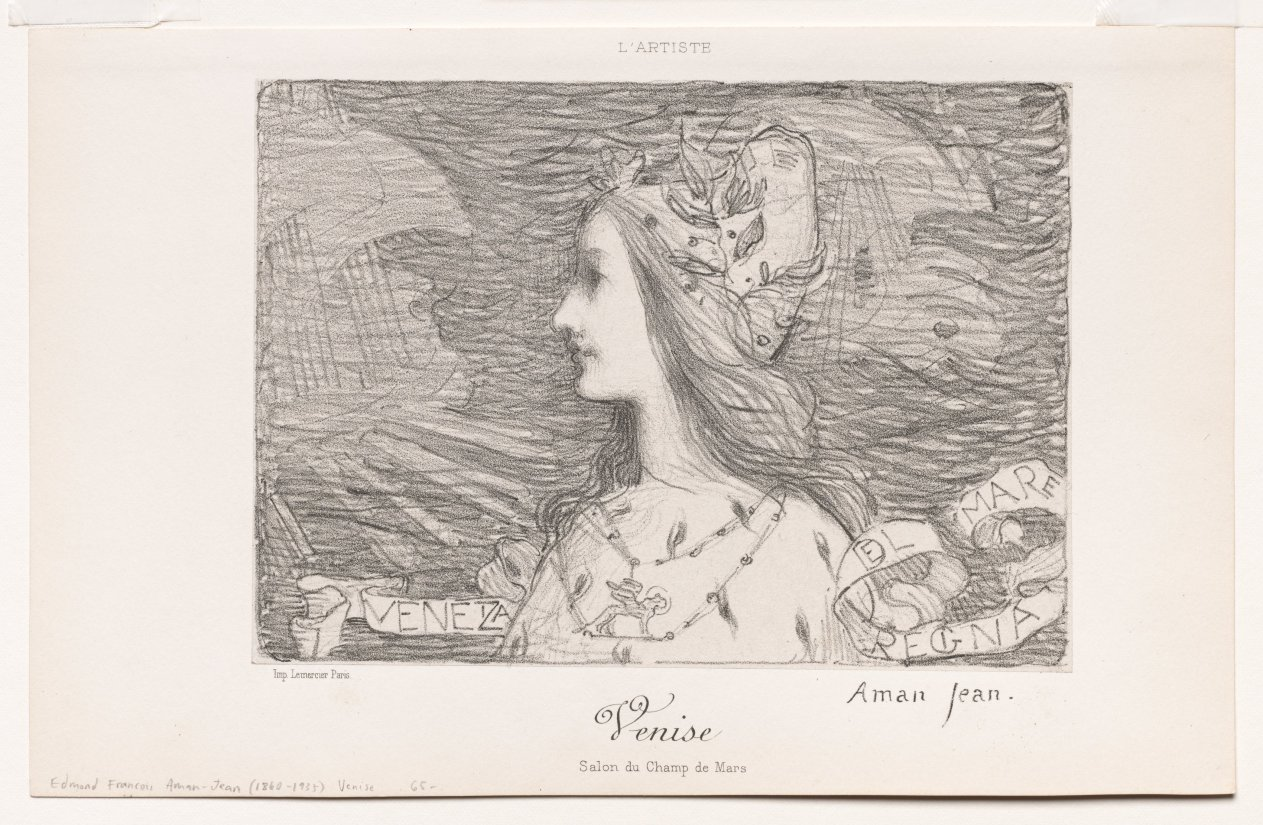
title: Venice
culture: France, 19th century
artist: Edmond François Aman-Jean (French, 1858–1936)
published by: Lemercier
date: 1892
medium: lithograph on chine collé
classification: Print